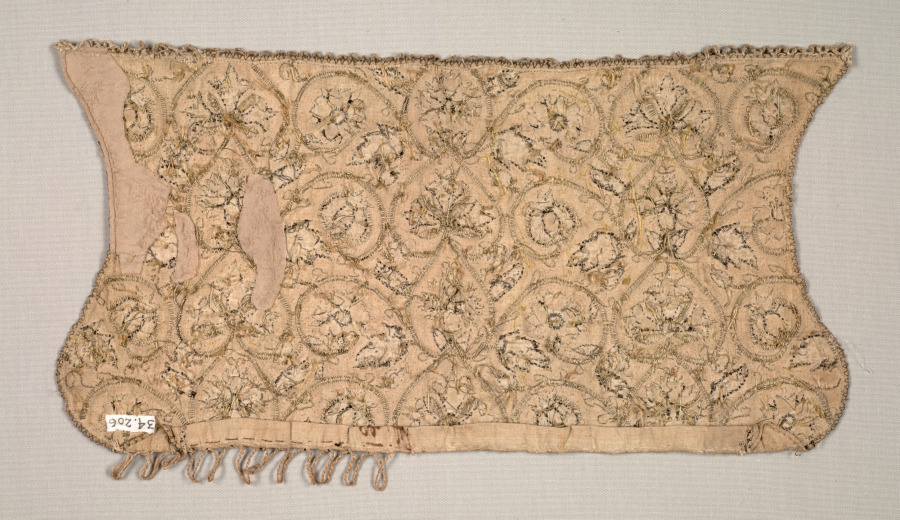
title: Coif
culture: England, Elizabethan Period, late 16th century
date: late 1500s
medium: Silk, gold and silver thread, sequins, padding, linen; embroidery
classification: Embroidery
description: According to Elizabethan embroidery scholar Jacqui Carey, construction of this woman’s coif is typical of the period, as is its design. The coif is a single piece of embroidered plain weave linen, cut in the usual way. The embroidery features pomegranate, honeysuckle, rose, carnation and acorn motifs set within stylized undulating stems and foliage. Most of the embroidery is worked with two distinct types of metal thread (thin metal strips wrapped around a silk core)—gilt thread and silver thread which has tarnished to black. Black silk thread also is used for the embroidery. Nine different stitches are used on the coif, including Elizabethan blanket stitch (variation three), Elizabethan ladder with filling, chain stitch, Elizabethan double Vandyke/twisted chain, Elizabethan plaited braid stitch (standard version), Elizabethan Ceylon stitch, Elizabethan trellis stitch, corded double detached buttonhole, and Elizabethan spider’s web. Many of the motifs are padded underneath the embroidery, likely with wool.